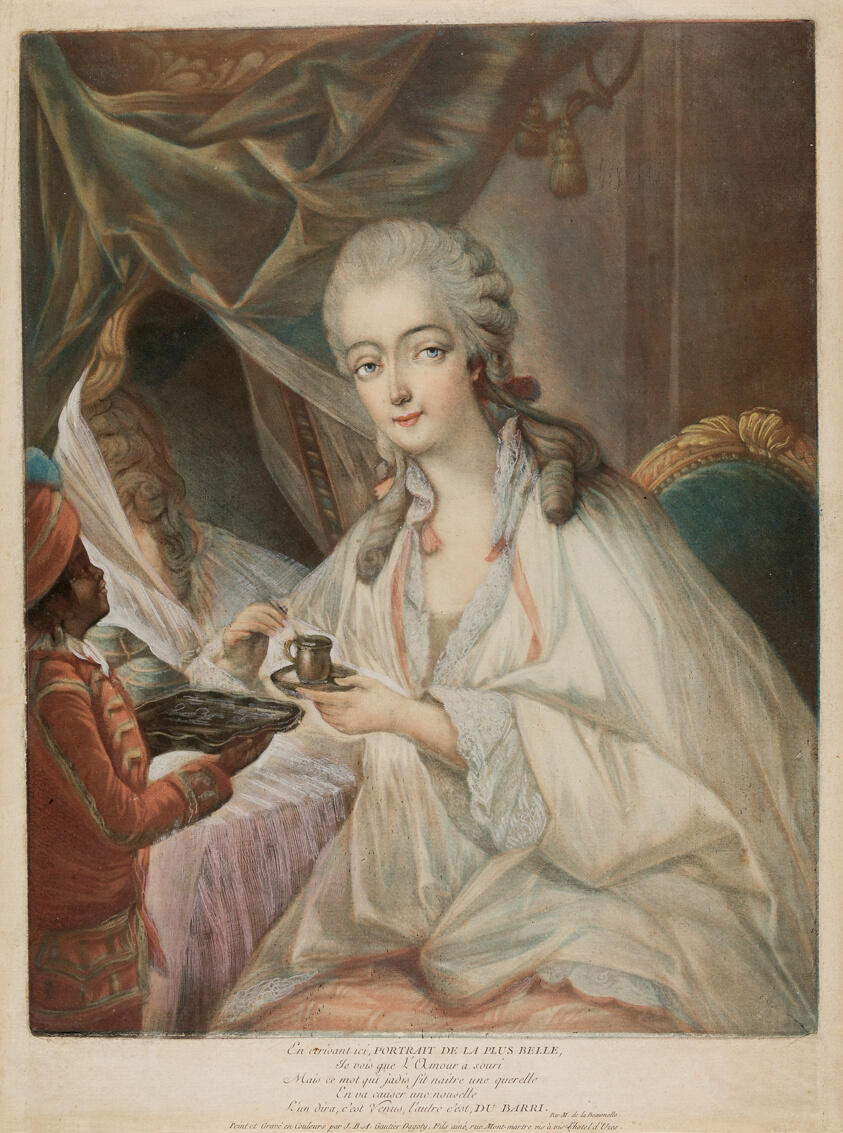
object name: Print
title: Jeanne Bécu, Comtesse Du Barry, and her servant Zamor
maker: Jean-Baptiste-André Gautier D'Agoty; French, 1740-1786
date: 1771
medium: Color aquatint, hand applied opaque white and embossing on laid paper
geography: France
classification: aquatint; print; prints and drawing